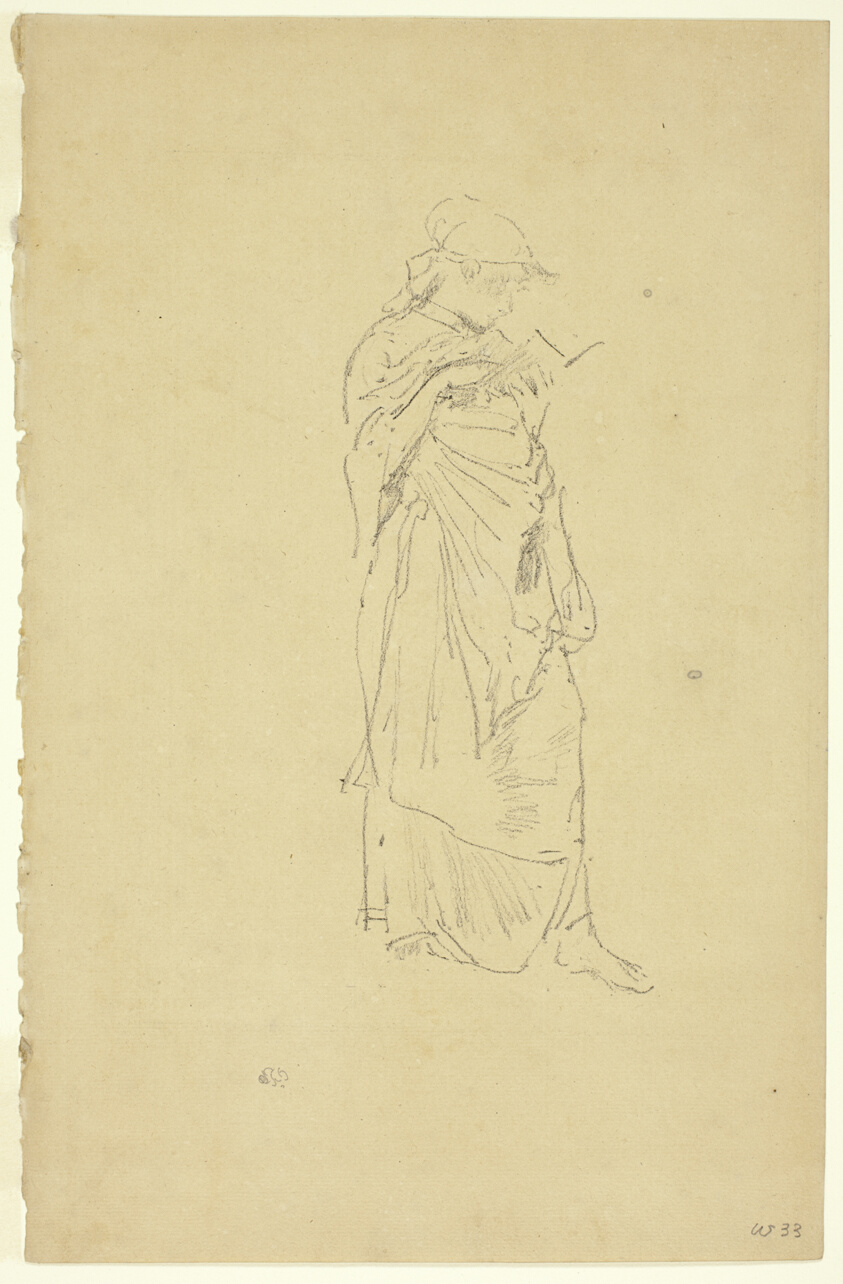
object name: Print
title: The Novel: Girl Reading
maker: James McNeill Whistler (American, 1834-1903)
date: probably 1889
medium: Transfer lithograph in black on tan laid paper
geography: United States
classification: transfer lithograph; lithograph; print; prints and drawing; paper